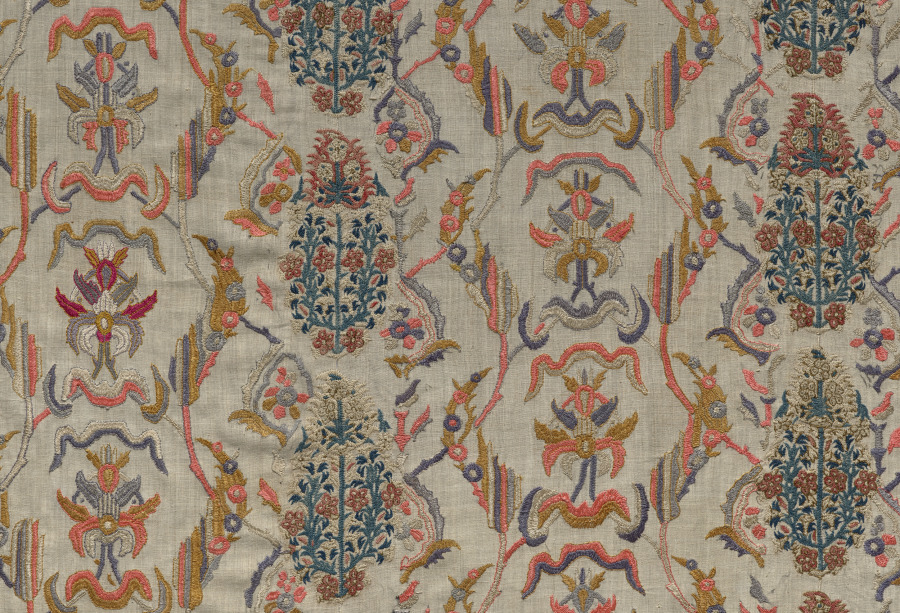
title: Bedspread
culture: Greece, Epirus, Yaninna, 19th century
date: 1800s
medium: embroidery: silk on linen tabby ground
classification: Embroidery